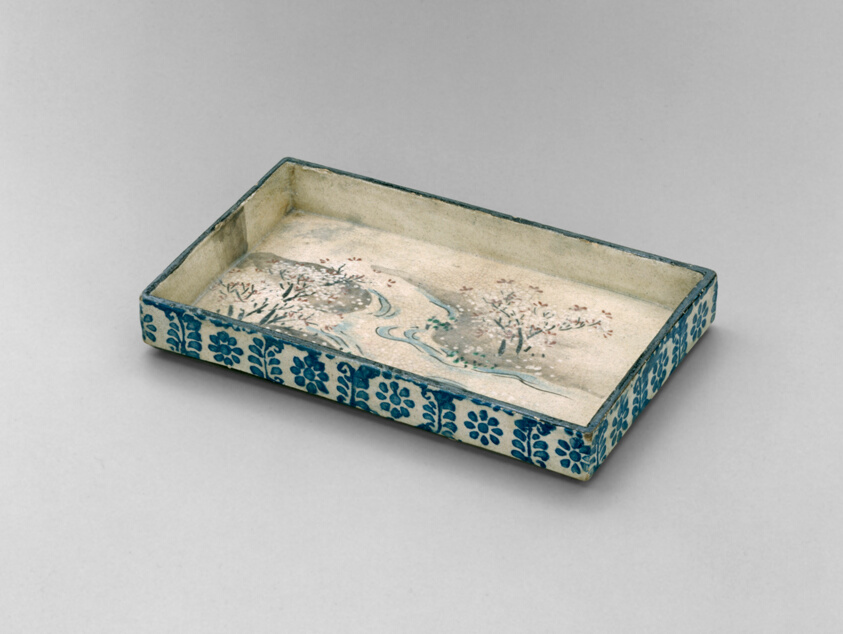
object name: Decorative Arts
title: Dish with Design of Landscape with Blossoming Trees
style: Japanese (culture or style)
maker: Ogata Kenzan (Japanese, 1699/1712)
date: Edo period (1610–1898); Narutaki period (1699–1712)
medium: Glazed stoneware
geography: Japan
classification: dish (vessel); porcelain; ceramics; asian art; decorative arts